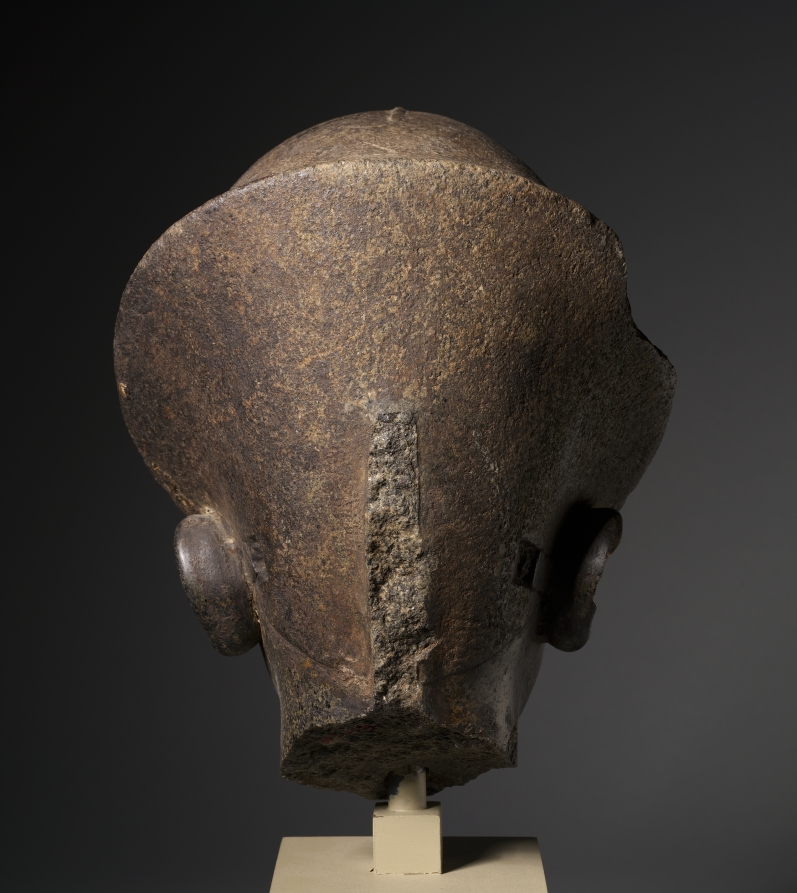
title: Head of Amenhotep III Wearing the Blue Crown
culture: Egypt, New Kingdom (1540–1069 BCE), Dynasty 18, reign of Amenhotep III (1390–1352 BCE)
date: c. 1391–1353 BCE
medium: granodiorite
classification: Sculpture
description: During the long, peaceful reign of Amenhotep III, Egypt reached a pinnacle of wealth and splendor. This magnificent portrait captures the ruler's exotic features to perfection. He has large, almond-shaped eyes, elegant arched eyebrows, and a full mouth. His face is youthful and without blemish. The bone structure is lost in the fleshy fullness of the face. The contrast between polished and roughened surfaces is a hallmark of hard stone images of Amenhotep III. The flesh areas were smoothed to a glistening sheen, while the eyeballs and the crown were left rougher. The roughening of the crown also had a practical purpose, for the upper portion was originally painted blue and the browband was painted yellow. The paint would have adhered better to the unpolished surface.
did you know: The Blue Crown or Khepresh was worn by New Kingdom Pharaohs into battle as well as in ceremonies.